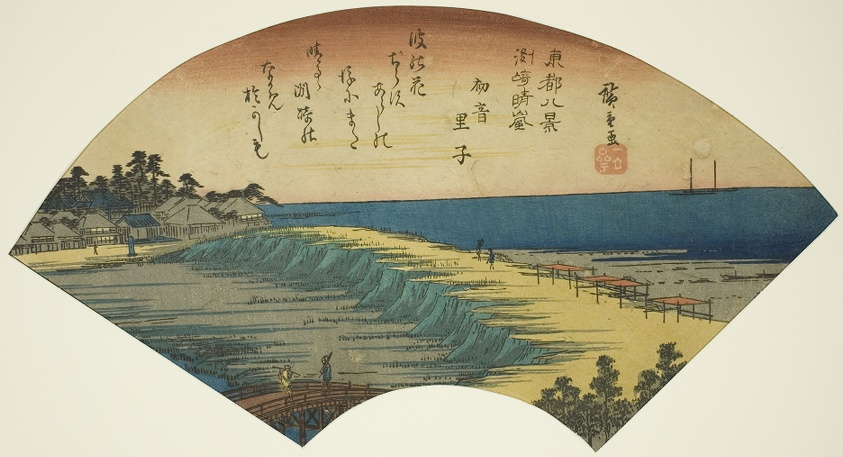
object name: Print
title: Clearing Weather at Susaki (Susaki seiran), from the series "Eight Views of the Eastern Capital (Toto hakkei)"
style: Japanese (culture or style)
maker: Utagawa Hiroshige 歌川 広重; Japanese, 1797-1858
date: 1836/37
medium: Color woodblock print; ogi-e on aiban sheet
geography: Japan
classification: woodblock print; print; asian art